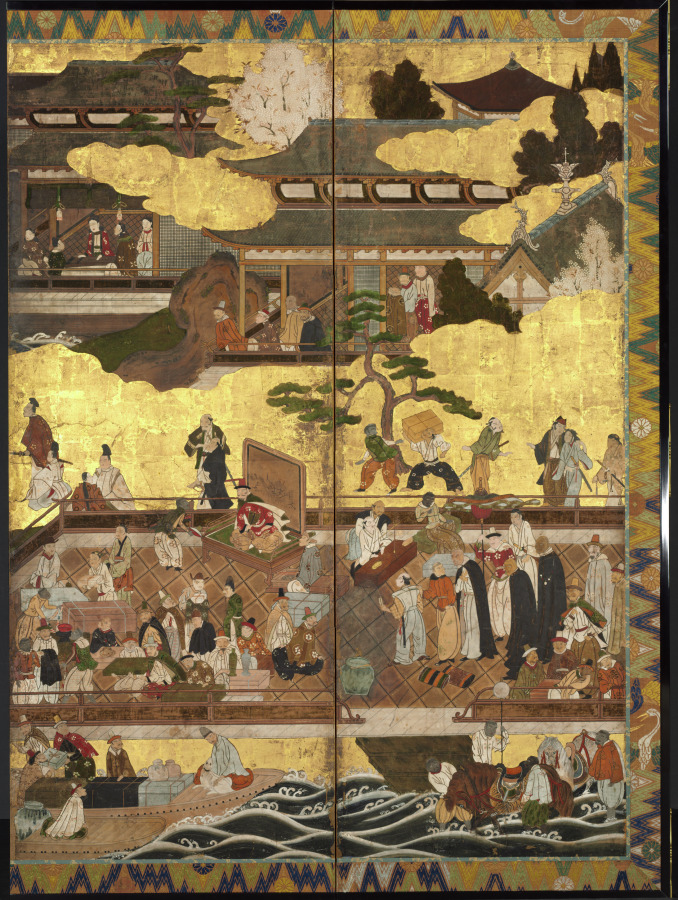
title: Arrival of the "Southern Barbarians"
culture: Japan, Momoyama period (1573–1615)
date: c. 1600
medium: One of a pair of six-panel folding screens; ink, color, and gold on paper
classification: Painting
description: This screen and its corresponding screen show Portuguese merchants arriving in Japan, having crossed the oceans in their large ship with a multinational crew. The Portuguese were known in Japan as the “Southern Barbarians” because they arrived from the south and their customs and manners were unfamiliar to the Japanese, who had not encountered anyone from Europe until their first appearance in 1543. In 1639, the Portuguese were forced out of Japan, mainly owing to internal difficulties caused by their Catholic missionaries, but they were a major conduit for both objects and ideas from Europe for nearly 100 years.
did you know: Europeans were called "Southern Barbarians" because their ships arrived in Japan from the south.